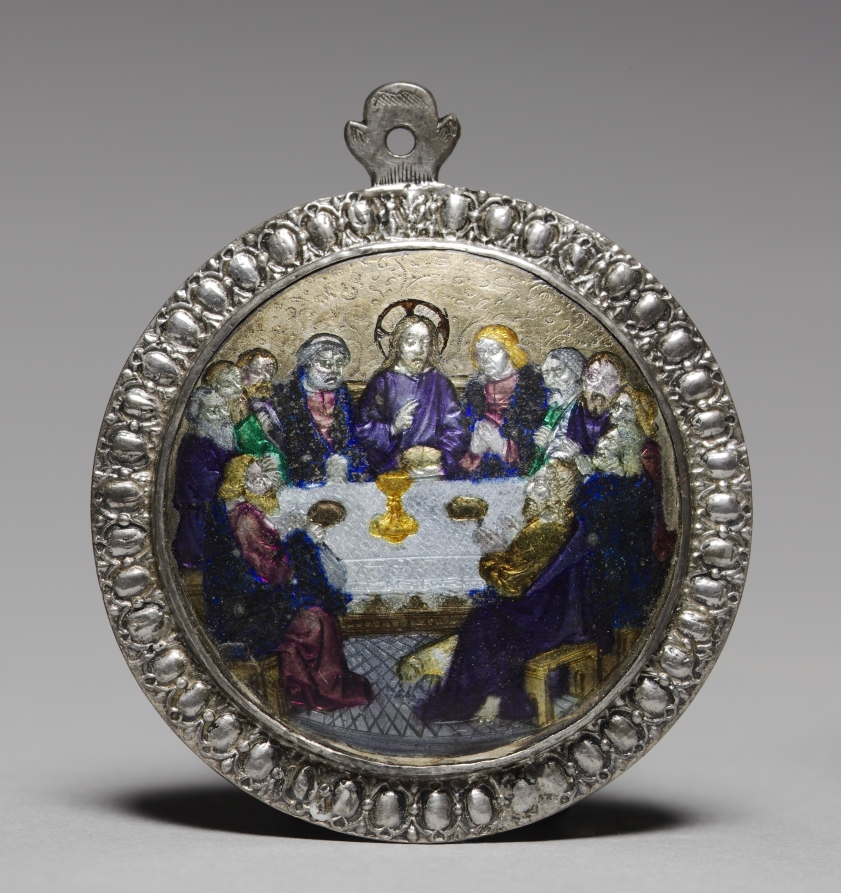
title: Medallion: The Last Supper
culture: France, 15th century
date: late 1400s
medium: basse-taille enamel on silver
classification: Enamel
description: The word enamel derives from the Old French esmail and the Old High German smelzen, meaning "to smelt." This is the most crucial process in the making of enamel. To prepare enamel, the constituents of glass (flint, or sand, as well as red lead, and soda or potash) are heated together to form a clear flux. To this a coloring agent (usually a metallic oxide) is added: copper for green, cobalt for blue, iron for red or brown. The enamel is then allowed to cool and solidify in slabs. Before use, each color is separately ground into a fine powder, placed on a prepared metal surface, and fired in a kiln. When cool, the surface is polished to remove any imperfections and add brilliance to the colors. The difference between the various enameling techniques lies chiefly in the methods used to prepare the metal surface for the enamel.